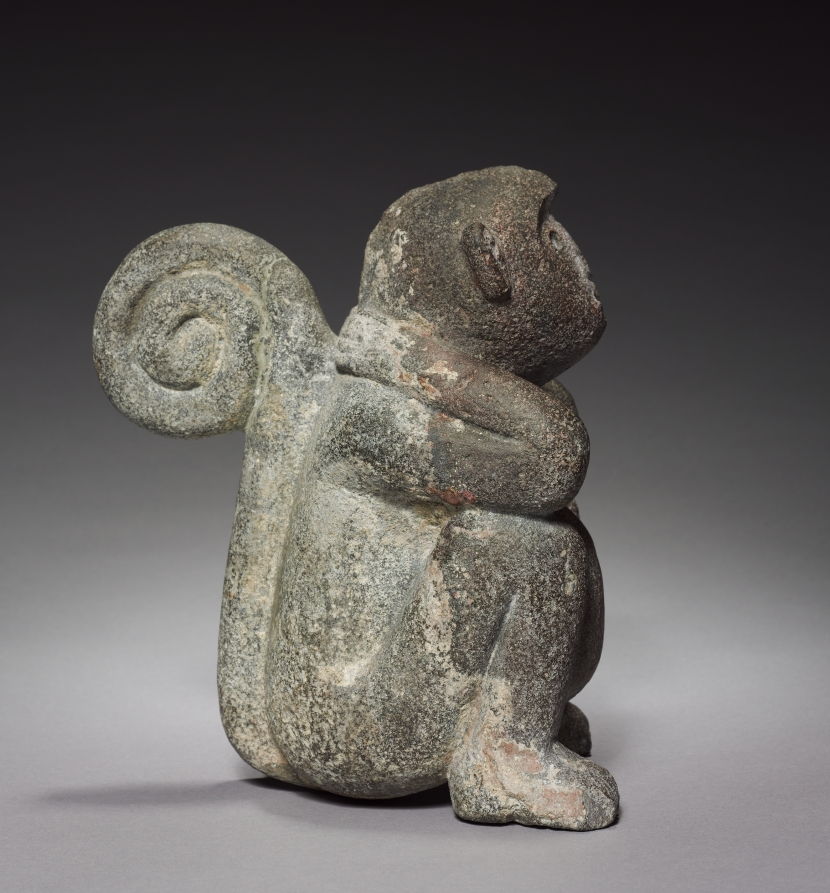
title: Monkey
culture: Central Mexico, Tacuba, Aztec, Post-Classic Period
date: 1325–1519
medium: stone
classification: Stone